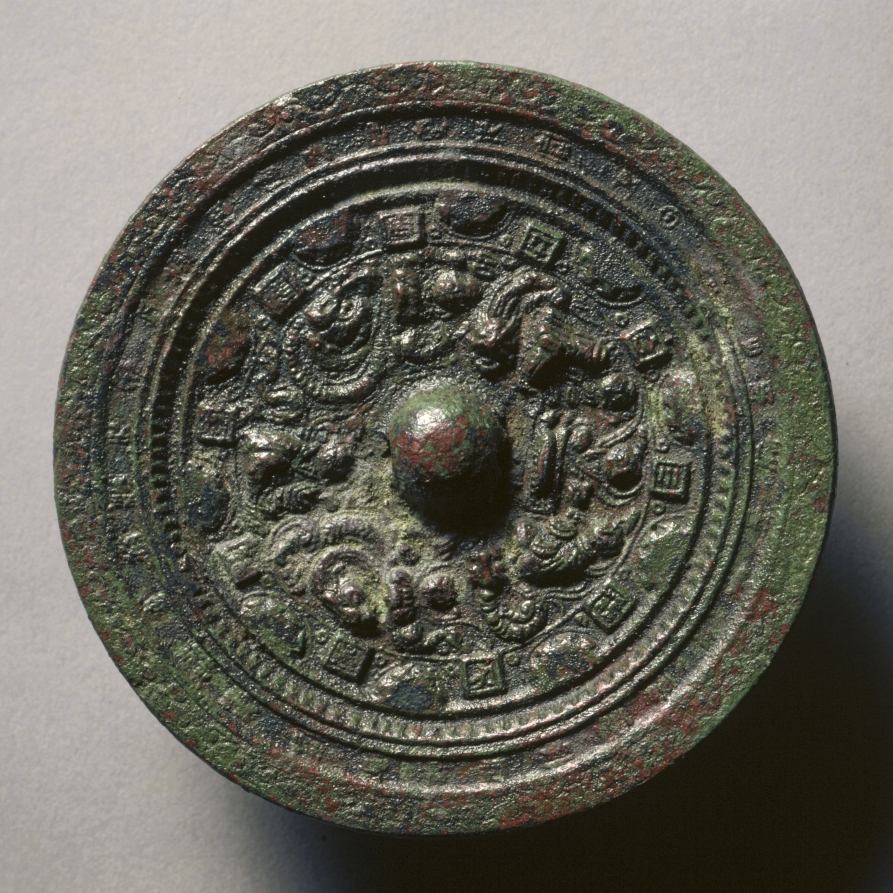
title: Mirror with Deities and Animals Surrounded by Rings of Squares and Semicircles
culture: China, Eastern Han dynasty (25–220 CE)(?)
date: early 100s–early 200s CE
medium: bronze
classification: Metalwork